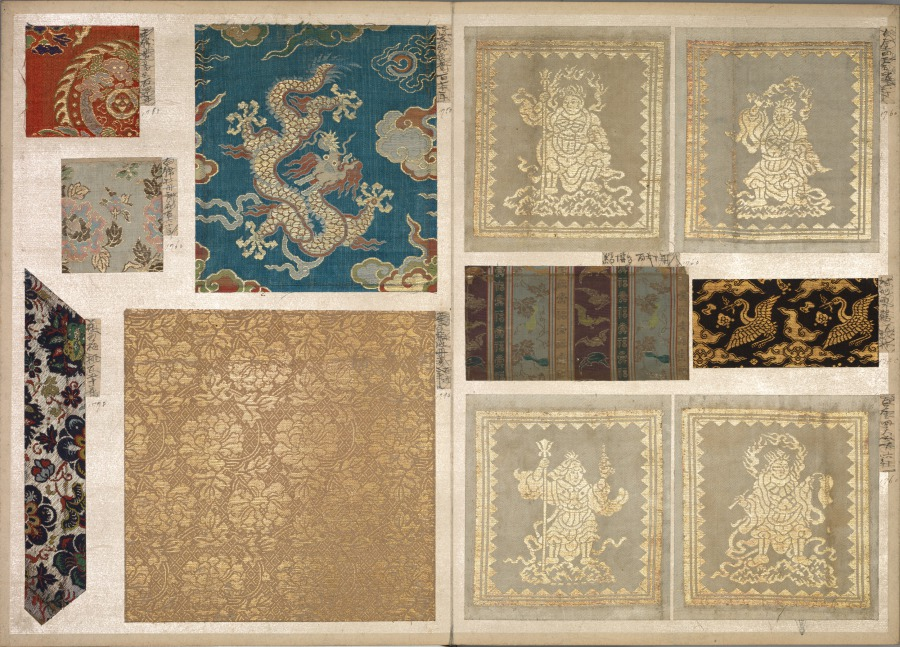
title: Album of Textile Samples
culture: Japan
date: 1790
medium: silk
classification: Textile